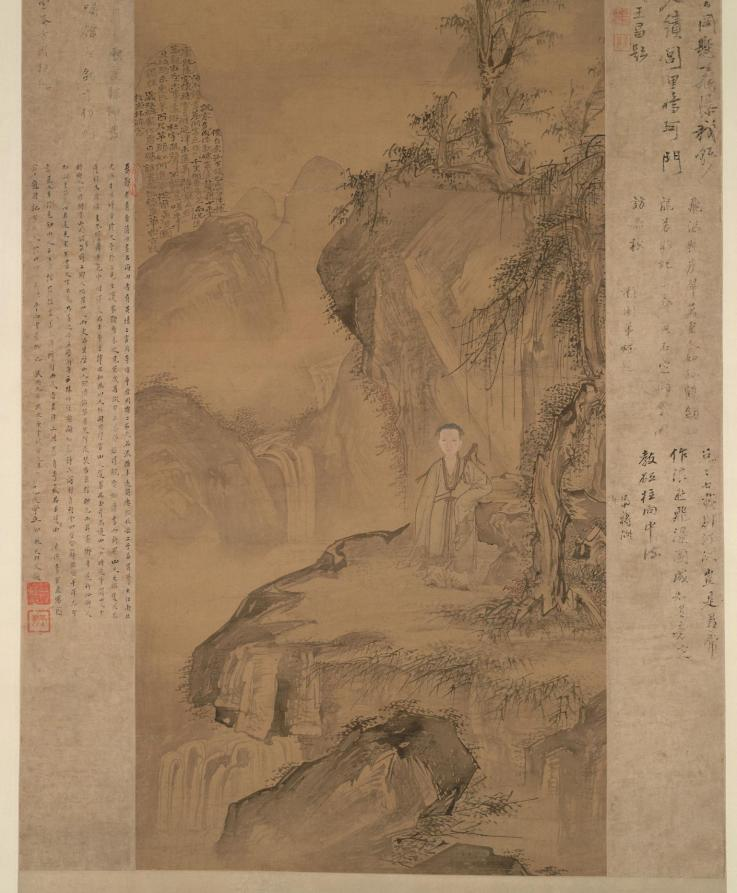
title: Layered Peaks and Splashing Waterfall: Portrait of Hua Yan as a Young Man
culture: China, Qing dynasty (1644-1911)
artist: Hua Yan (Chinese, 1682–c. 1765)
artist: and Wei Shijie (Chinese, 1667–after 1747)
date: 1705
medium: Hanging scroll; ink and color on silk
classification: Painting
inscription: 寫照余非擅，營圖爾自高。/ 偶然裁尺幅，毋待著三豪。/ 護嶺笙疑徹，豐誠劍且韜。/ 懸崖對飛雪，如聼廣陵濤。/ 士傑為秋岳道盟作小影並題。 [印]：魏士傑，子良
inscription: 僕自棄孤，乍設己隨四方。蓬根飄零，竟成浩嘆。 媿窮途於阮籍。十年悔不讀書。羞問字之侯芭。千里何曾負笈。而況匡廬既遠。空懐飛雪之崖。延津未遥，莫辯化龍之劍。 慈親在望，空事遠游。杜宇為聲，不如歸去。嗟乎，半生岐途，未免亡羊。百尺竿頭，如何進歩。 從前孟浪，圖此猖狂。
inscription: Top inscription on the painting by Jiang Hongdao 將弘道, dated yiyou, the forty-fourth year of the Kangxi era (1705)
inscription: Seven additional colophons on the silk mounting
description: This portrait was jointly executed by Wei Shijie and Hua Yan himself who painted the landscape in the background. Hua Yan is shown here at the age of about 23. The sword at his back is a reference to his early desire for a military career, while the scholar’s robe suggests an opposing aspiration. Together these are signs of a complex personality. The painting also reveals Hua Yan’s early talent in painting. While Wei Shijie is little known, Hua Yan would later become a well-known painter. In addition to Wei Shijie and Hua Yan, nine of Hua Yan’s contemporary friends left inscriptions on the painting.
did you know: Hua Yan's autobiographical inscription, full of remorse and insecurity, is squeezed into the contour of a hill in the upper left.